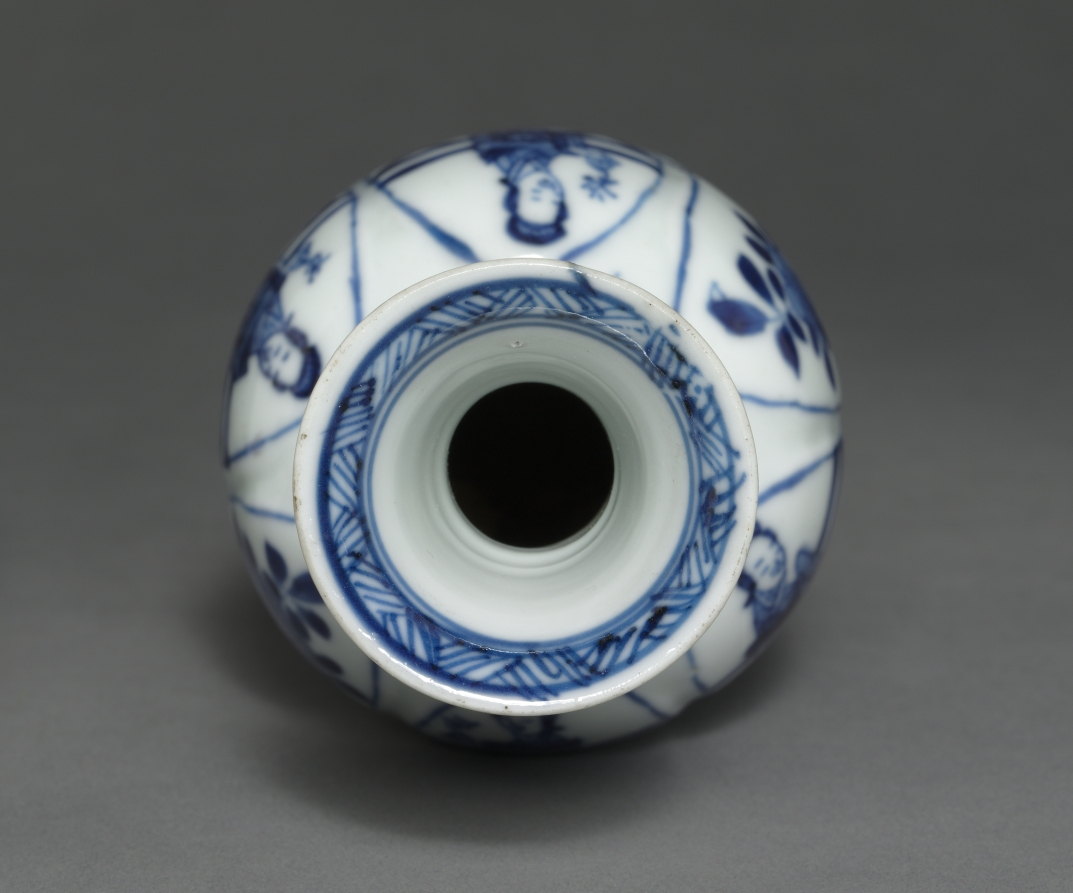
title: Vase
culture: China, Qing dynasty (1644-1911)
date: 19th Century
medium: porcelain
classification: Ceramic